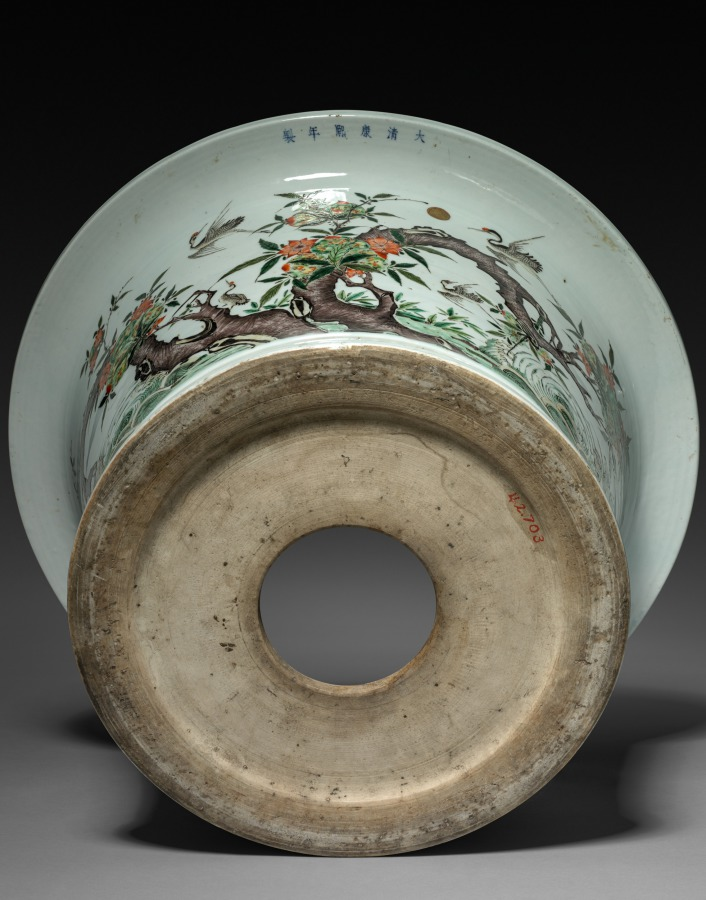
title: Jardiniere with Cranes and Peaches over Waves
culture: China, Jiangxi province, Jingdezhen kilns, Qing dynasty (1644-1911), Kangxi reign (1661-1722)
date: 1662–1722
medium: porcelain with famille verte overglaze enamel decoration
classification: Ceramic